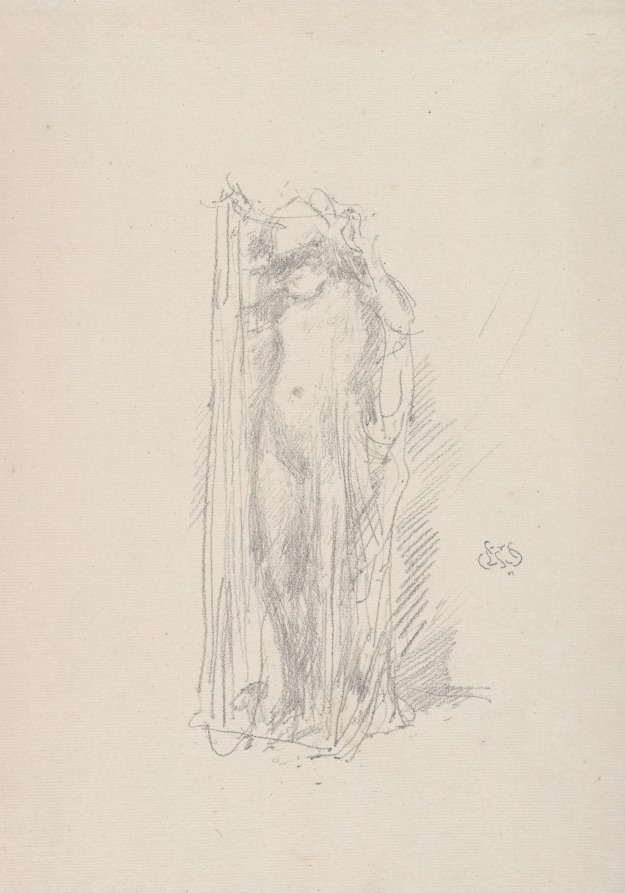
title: Model Draping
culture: America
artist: James McNeill Whistler (American, 1834–1903)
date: 1890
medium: lithograph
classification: Print